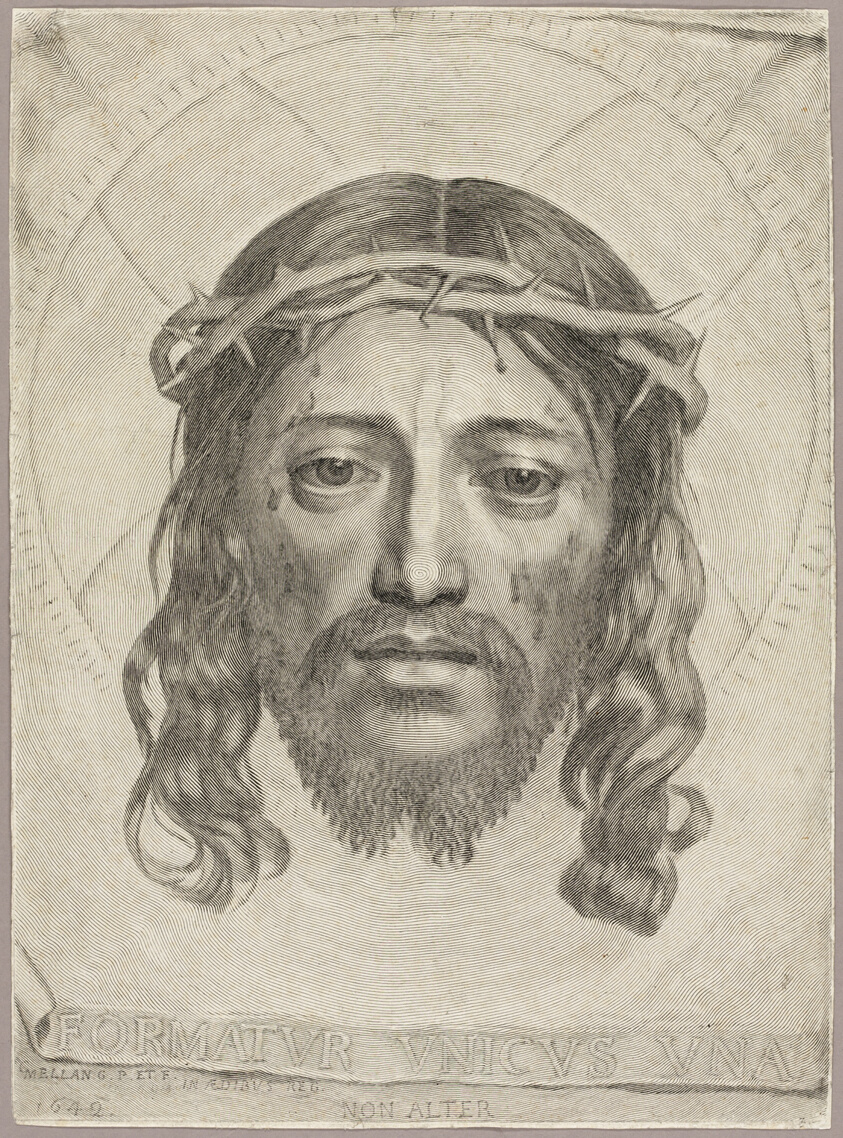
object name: Print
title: The Sudarium of Saint Veronica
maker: Claude Mellan (French, 1598-1688)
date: 1649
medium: Engraving in black on buff laid paper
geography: France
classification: engraving; print; prints and drawing